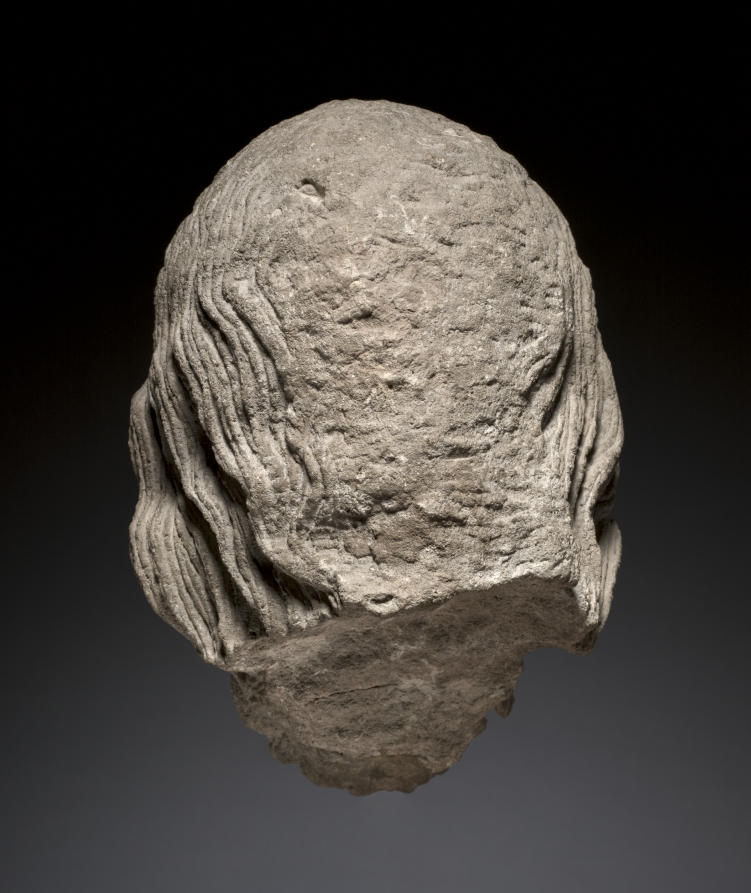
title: Head of an Apostle from the South Portal of the Cathedral of Thérouanne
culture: Northern France (Pas-de-Calais), Thérouanne, 13th century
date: c. 1235–1240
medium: oolitic limestone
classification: Sculpture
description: These monumental stone heads are among the substantial known remains of the sculptural program of Thérouanne’s cathedral, which was razed by Emperor Charles V of Spain in June 1553. These heads were found in a wall of rue Ste. Croix in the town of Saint Omer (a short distance to the north) in January 1923. This group of sculptures from the gable of the south portal of Thérouanne, which includes a stylistically related Christ as Judge, is recorded to have been moved to the Cathedral of Saint Omer in 1554. With their deeply carved wavy hair, curly beards, wrinkled foreheads, and ponderous facial features, these imposing heads—even in their now fragmentary and weathered state—attest to the powerful monumentality of the stone sculpture covering French church facades of the Gothic period.